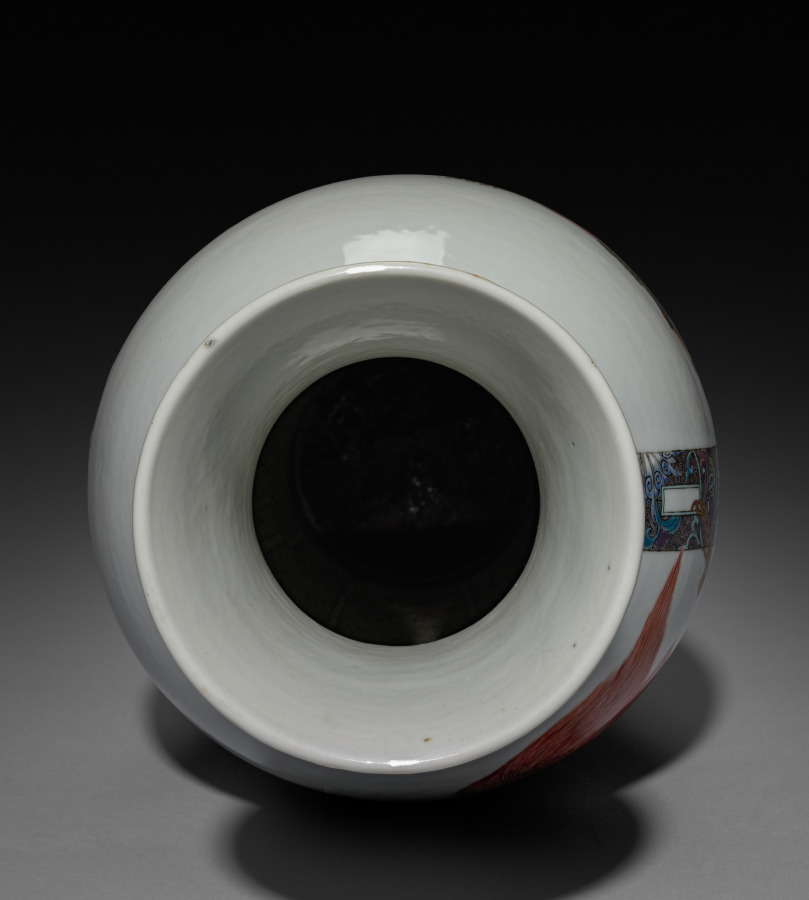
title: Vase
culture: China, Qing dynasty (1644–1911), Qianlong reign (1736–95)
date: 1736–95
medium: porcelain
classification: Ceramic